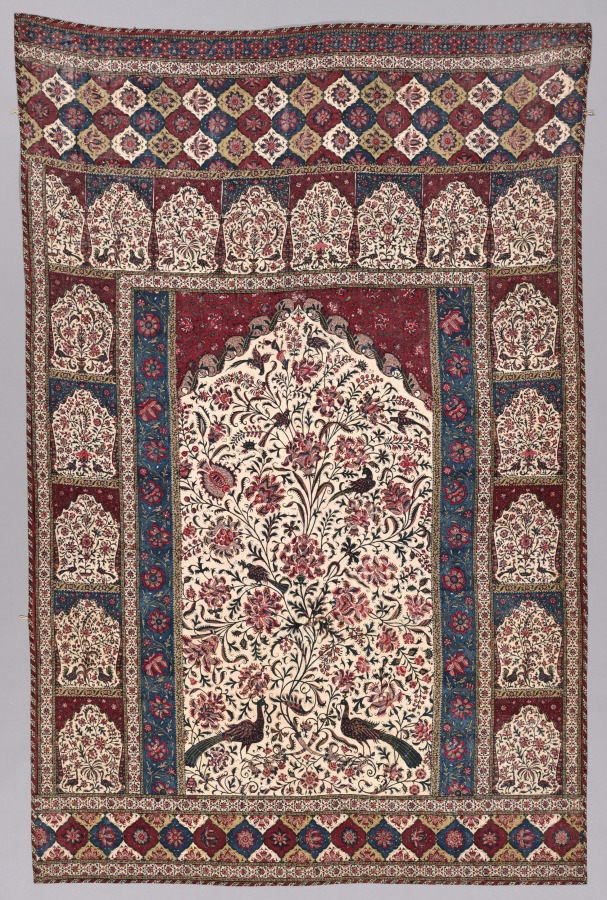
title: Chintz door curtain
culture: Iran, Isfahan, Qajar period (1779–1925)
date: 1800s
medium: Cotton: plain weave; chintz; hand drawing and block printing: bleach, mordant, and dye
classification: Textile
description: Lightweight white cotton cloth was transformed into this beautiful chintz, admired for its vibrant and durable colors, stunning pattern, fine quality, and rarity. Peacocks and a variety of birds appear amid vines with fanciful blossoms in the niche field and main border. Striking end borders feature blossoms in leaf-outlined diamonds on alternating ground colors of white, mustard, red, and blue. The complex chintz technique involving hand drawing, block printing, bleach, mordant, and dyes was developed in India. By the 1600s and 1700s, chintz was designed to target European and Asian markets and often featured large tree-of-life patterns. Chintz was also made in Iran by the 1400s, but this rare door curtain from the 1800s is among the oldest known examples.